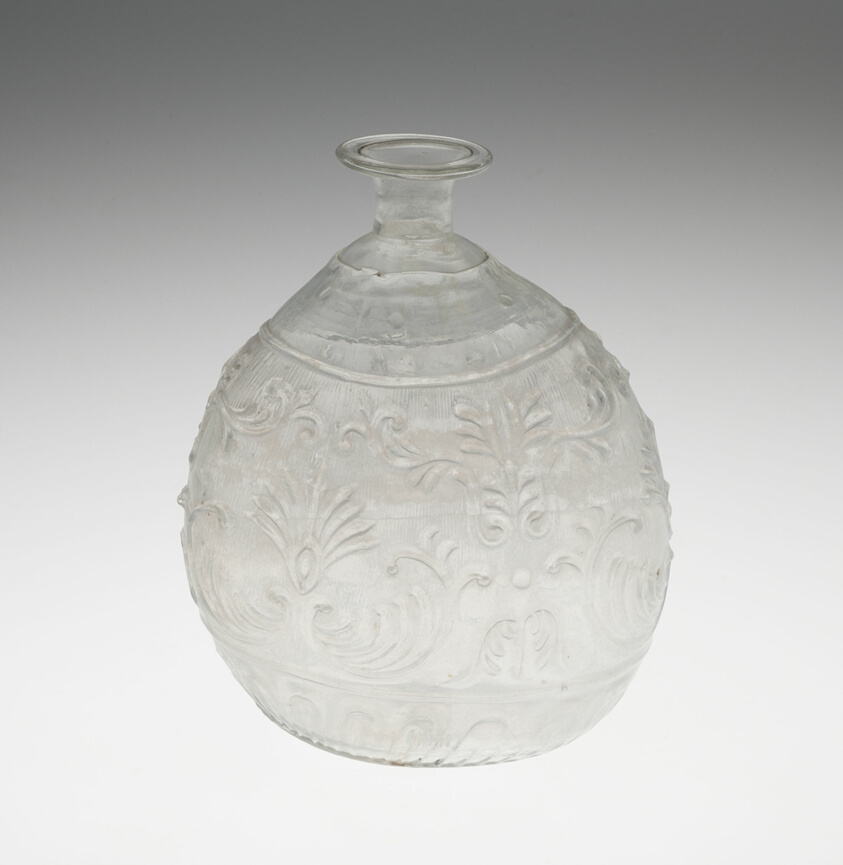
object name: Glass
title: Flask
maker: Austria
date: c. 1835/50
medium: Glass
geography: Austria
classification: glass; european decorative arts